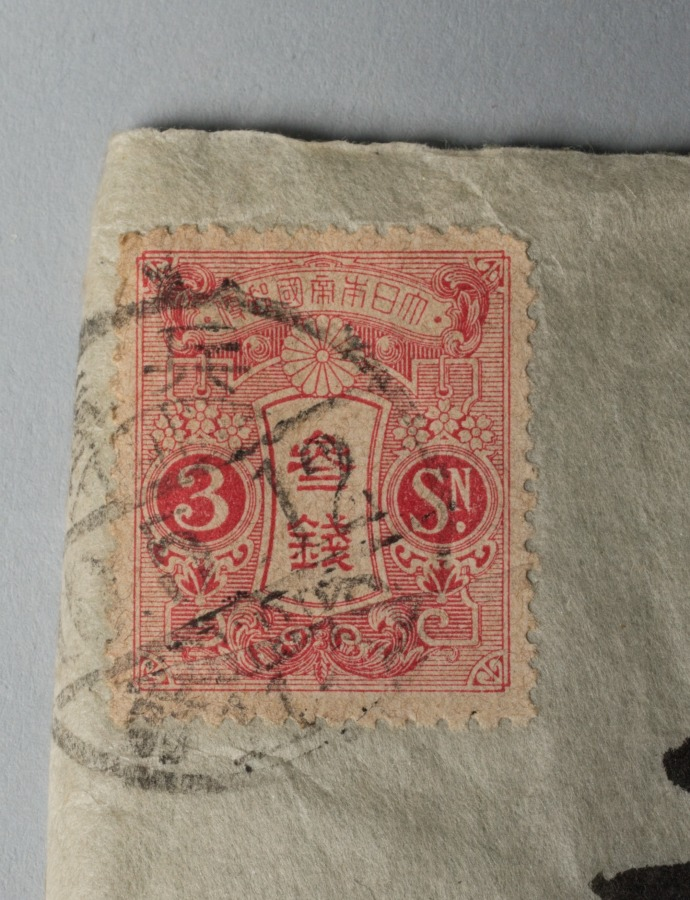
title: Courtesan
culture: Japan, Edo period (1615–1868)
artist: Matsuno Chikanobu (Japanese, active 1716–35)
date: 1716–35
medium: hanging scroll; ink and color on paper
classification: Painting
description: A glamorous courtesan sports an outer robe decorated with large roundels featuring plant motifs including iris and bush clover. Little is known about the life and artistic training of the painter Matsuno Chikanobu, an ukiyo-e artist who painted in a style strongly reminiscent of that of the Kaigetsudō studio. Many of his known paintings are on silk, and executed with high quality pigments, indicating that his primary clientele were wealthy individuals.